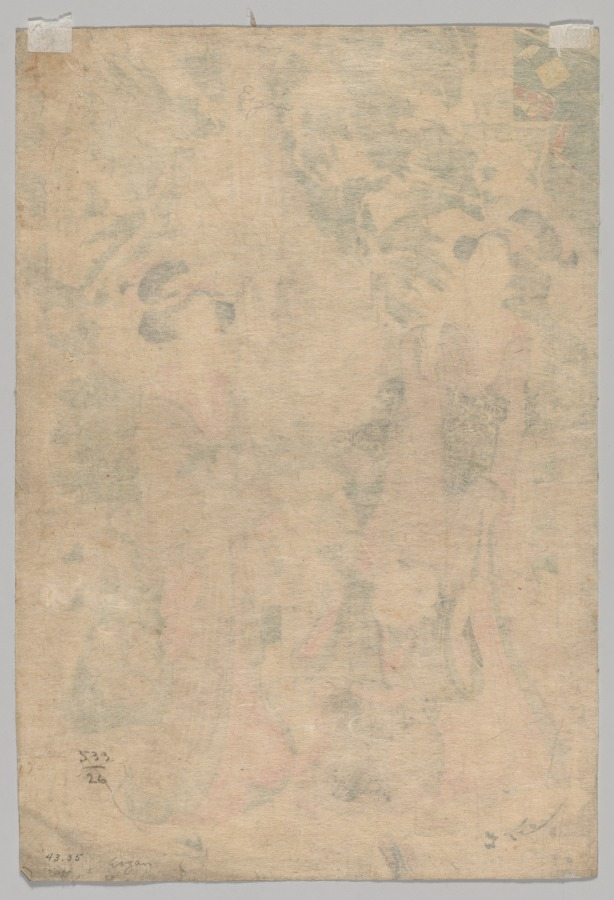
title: Mount Haruna in Kozuke Province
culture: Japan, Edo period (1615–1868)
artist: Kikukawa Eizan (Japanese, 1787–1867)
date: c. 1830s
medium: color woodblock print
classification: Print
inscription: Signature: Yeizan fude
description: This print is the right-hand sheet from a triptych depicting a famous Buddhist pilgrimage site in what is now Gunma prefecture. The women in the foreground observe men undergoing ritual purification by standing under a sacred waterfall. The full composition showed eight women and a child traversing a bridge before a panorama of the religious site.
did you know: The Buddhist sculptures in the upper left corner of this print represent Fudo Myoo flanked by two child deities called Seitaka and Kongara.